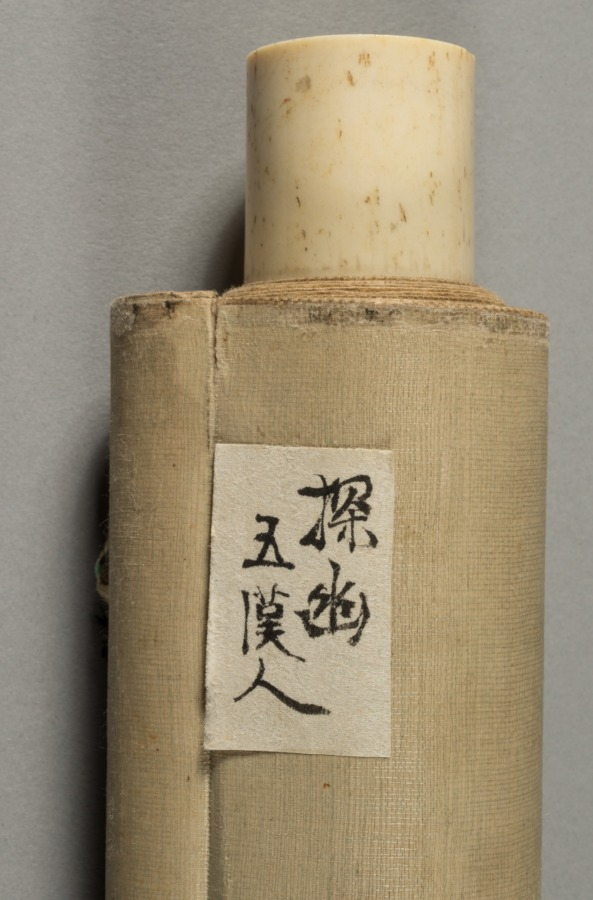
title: Chinese Sages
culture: Japan, Edo period (1615–1868)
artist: attributed to Kano Tan’yū (Japanese, 1602–1674)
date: mid- to late 1600s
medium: hanging scroll; ink and color on silk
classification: Painting